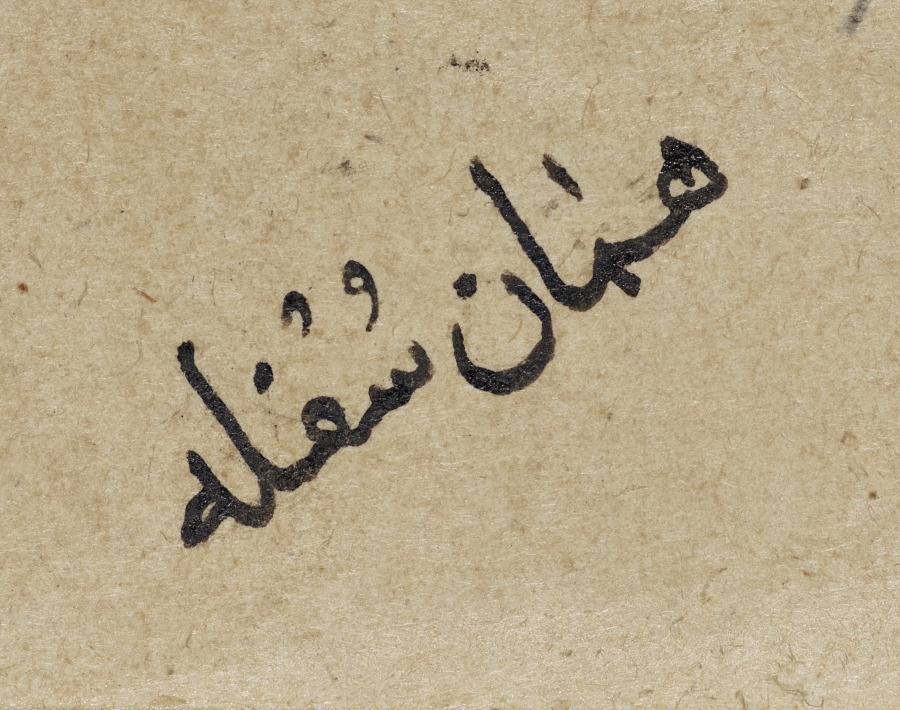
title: Portrait of Nushirwan the Just (verso) from a Shahnama (Book of Kings) of Firdausi (940–1019 or 1025)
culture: Iran, Tabriz, Ilkhanid period (1256-1353)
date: 1330–35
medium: opaque watercolor, ink, and gold on paper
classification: Manuscript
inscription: Script: Naskh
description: Mongol interest in the production of illustrated manuscripts eventually focused on Persian epic poetry. The Shahnama, a compilation of the epics and tales of Iran's legendary heroes, was a natural choice; the book included many subjects that suited Mongol taste, such as banquets, battles, hunting, and magical or fantastic events. Seated on the throne in the center of the painting is the Sasanian ruler of Iran, Khusraw I Anushirwan (531–579), descendant of Bahram Gur. Above the king's head an inscription reads, "Picture of Nushirwan the Just." The figure in the elaborate turban to the left of the king is probably the young Minister Buzurgmihr, famous for his wisdom and virtue. To celebrate the explanation of a troublesome dream by Buzurgmihr, Nushirwan held a series of seven banquets. The text around this painting describes the fifth banquet.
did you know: The symmetrical composition conveys the stability, balance, and restraint during the reign of King Nushirwan the Just.